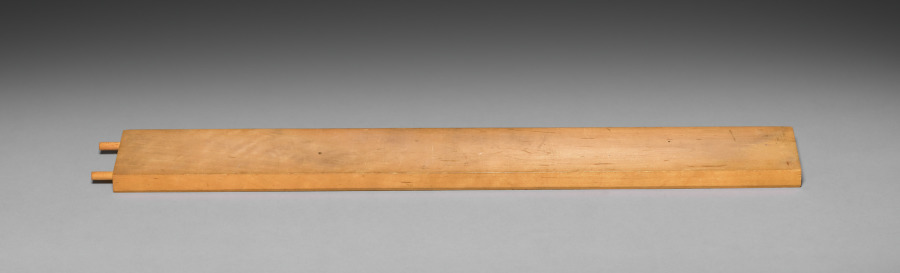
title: Train Track Section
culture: Denmark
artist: Boysen Toys (Danish)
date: 1900s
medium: wood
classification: Wood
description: Credit line: John D. Rockefeller General Education Board Grant II